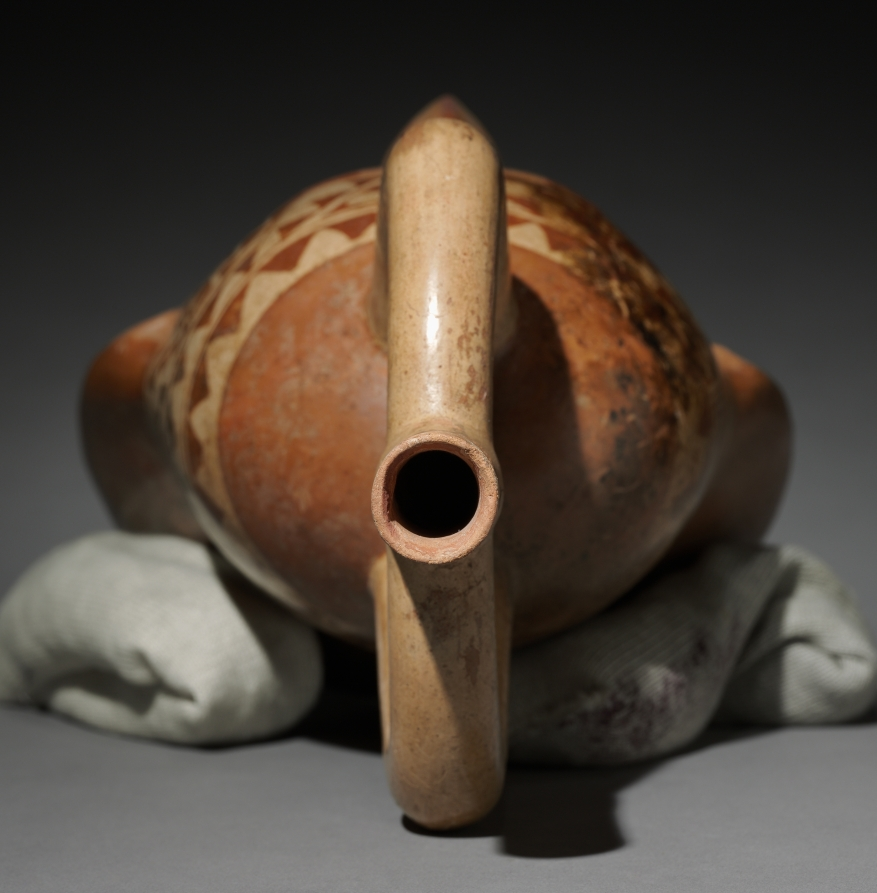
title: Portrait Head Vessel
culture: Peru, North Coast, Moche style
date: c. 200–550 CE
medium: earthenware with colored slips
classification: Sculpture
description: The Moche were unique in ancient Peru in creating realistic human portraits, usually in the form of ceramic vessels. In general, such vessels represent more than 750 individuals; identities are unclear but most are elite men, some probably rulers. The stirrup-shaped spout is a hallmark of Moche ceramic production.